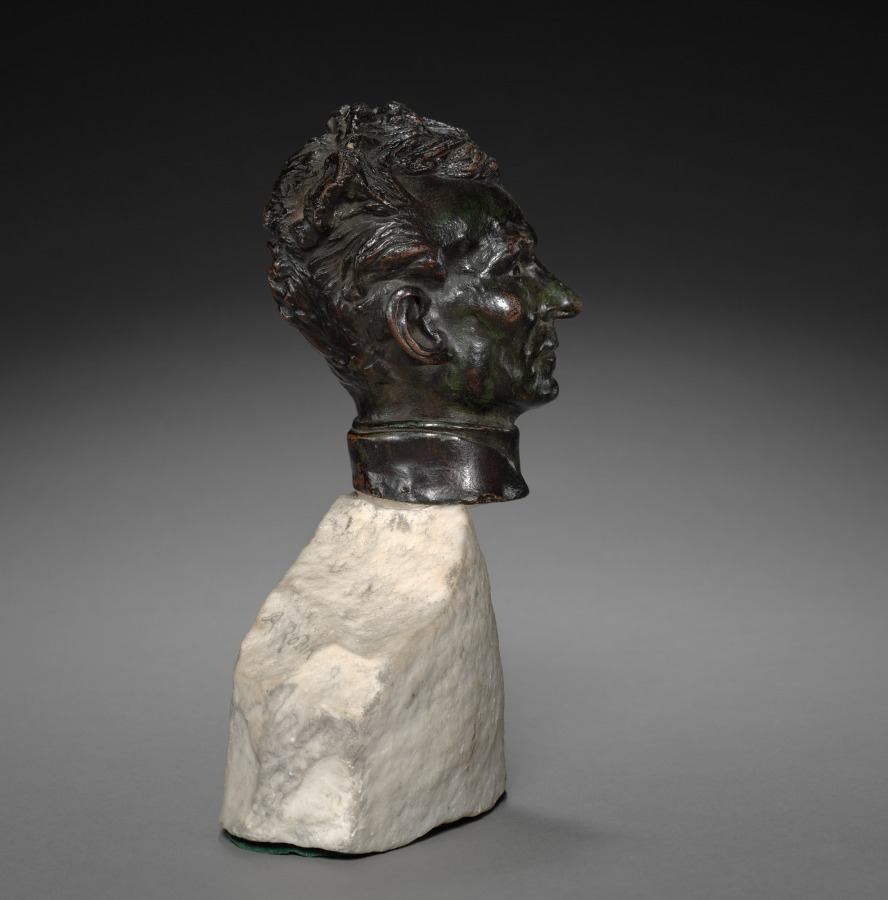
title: Father Pierre-Julien Eymard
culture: France, 19th century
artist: Auguste Rodin (French, 1840–1917)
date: ca. 1863 (original model)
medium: bronze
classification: Sculpture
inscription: Signed on left side of collar: "Rodin"; on base, back right: "A. Rodin"